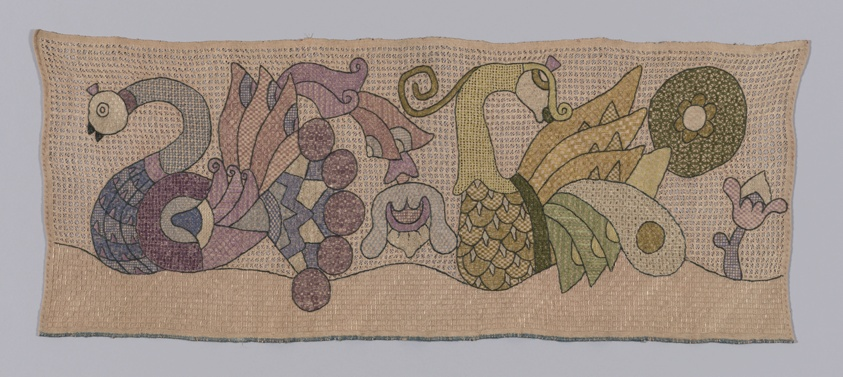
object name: Textile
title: Square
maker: Ukraine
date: 19th century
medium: Linen; drawn work and embroidered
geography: Ukraine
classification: textile; needlework (visual works); weaving